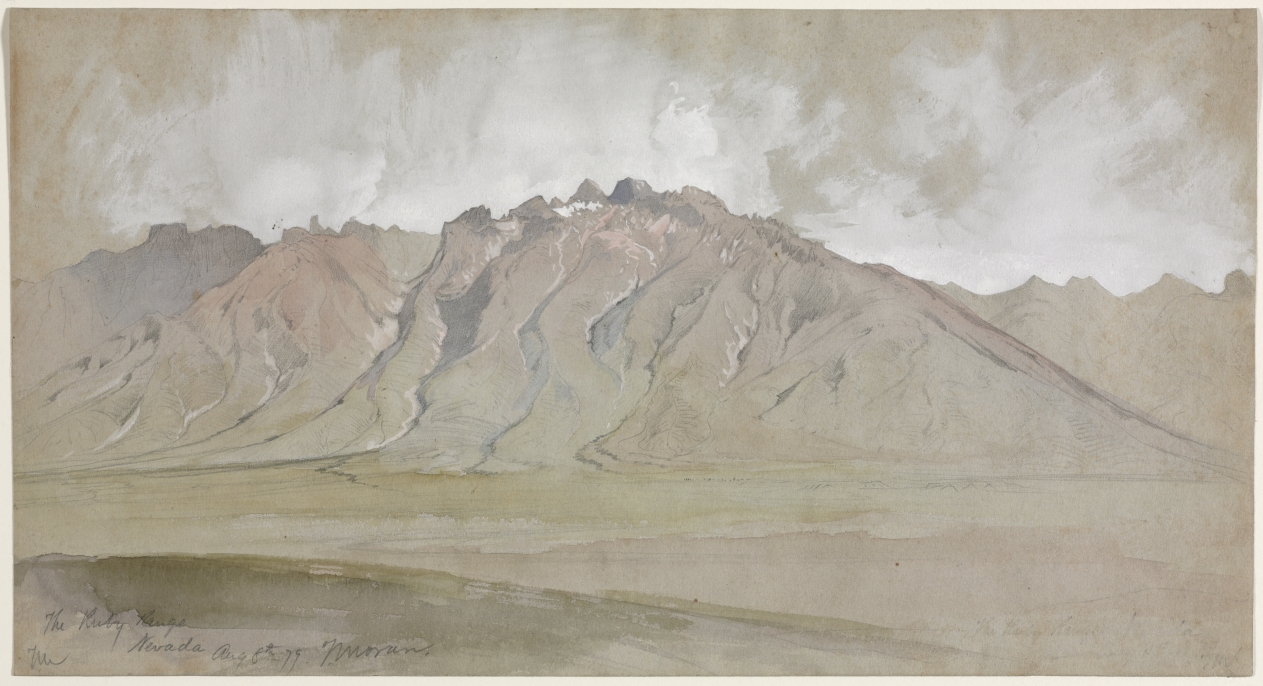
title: The Ruby Range, Nevada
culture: America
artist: Thomas Moran (American, born England, 1837–1926)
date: 1879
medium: watercolor, gouache and graphite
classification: Drawing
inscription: signed, lower left, in graphite: The Ruby Range / Nevada Aug 8th --79. TMoran. / TM ; by artist, lower right, in graphite [partially erased]: The Ruby Range Nevada / Aug 8th TM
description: Thomas Moran is especially well known for his sweeping views of remote areas in the American West. A gifted watercolorist who was deeply influenced by J. M. W. Turner, Moran found a realistic equivalent for the Englishman’s art in the strange hues of the mountains of Wyoming and Nevada, the bubbling springs and vaporous geysers of Yellowstone, and the fantastic rock formations of Arizona. Although he enjoyed dramatic effects, Moran did not exaggerate the spectacular landscapes of the American West; watercolors such as Ruby Range are accurate even in their surprising palettes, achieving an almost visionary intensity.